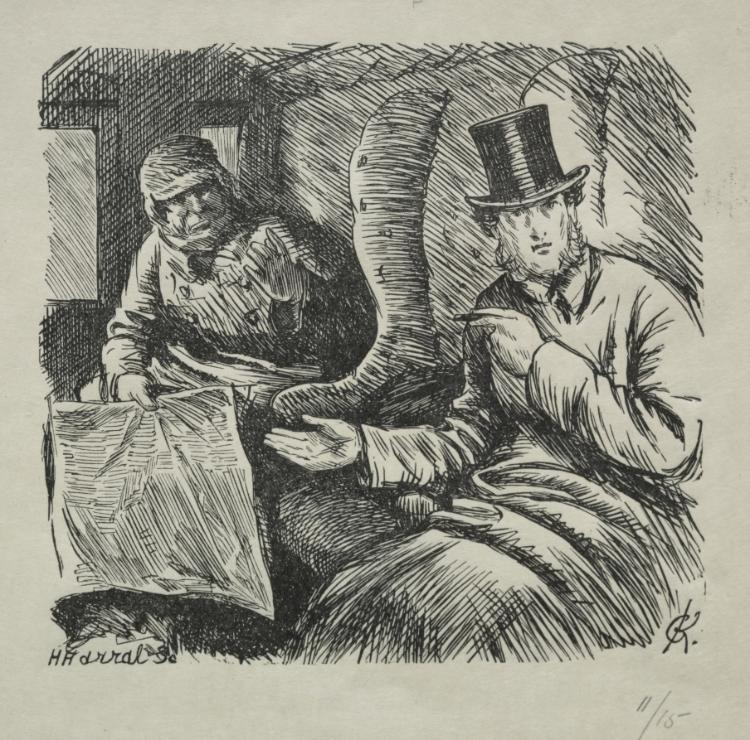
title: Smoking Strictly Prohibited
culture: England, 19th century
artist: Horace Harral (British, 1817–1905)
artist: after Charles Samuel Keene (British, 1823–1891)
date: 1868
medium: wood engraving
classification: Print